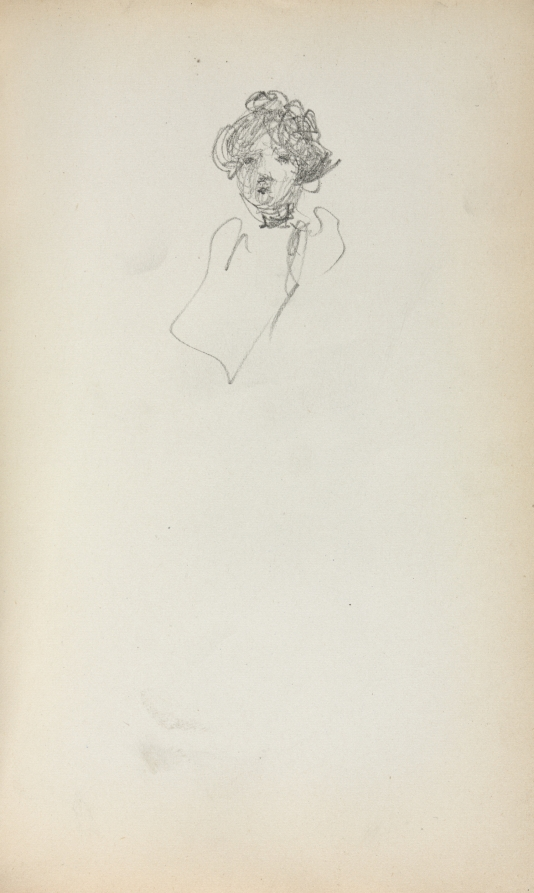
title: Italian Sketchbook: Head of a Woman (page 215)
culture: America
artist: Maurice Prendergast (American, born Newfoundland [now Canada], 1858–1924)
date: 1898–1899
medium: pencil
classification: Bound Volume